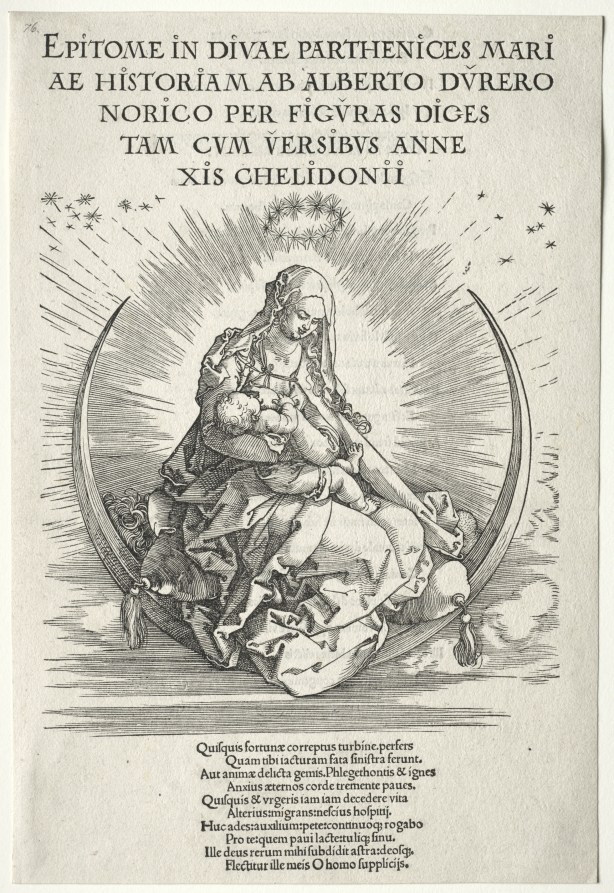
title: Life of the Virgin: Title Page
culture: Germany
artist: Albrecht Dürer (German, 1471–1528)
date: 1511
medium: woodcut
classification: Print